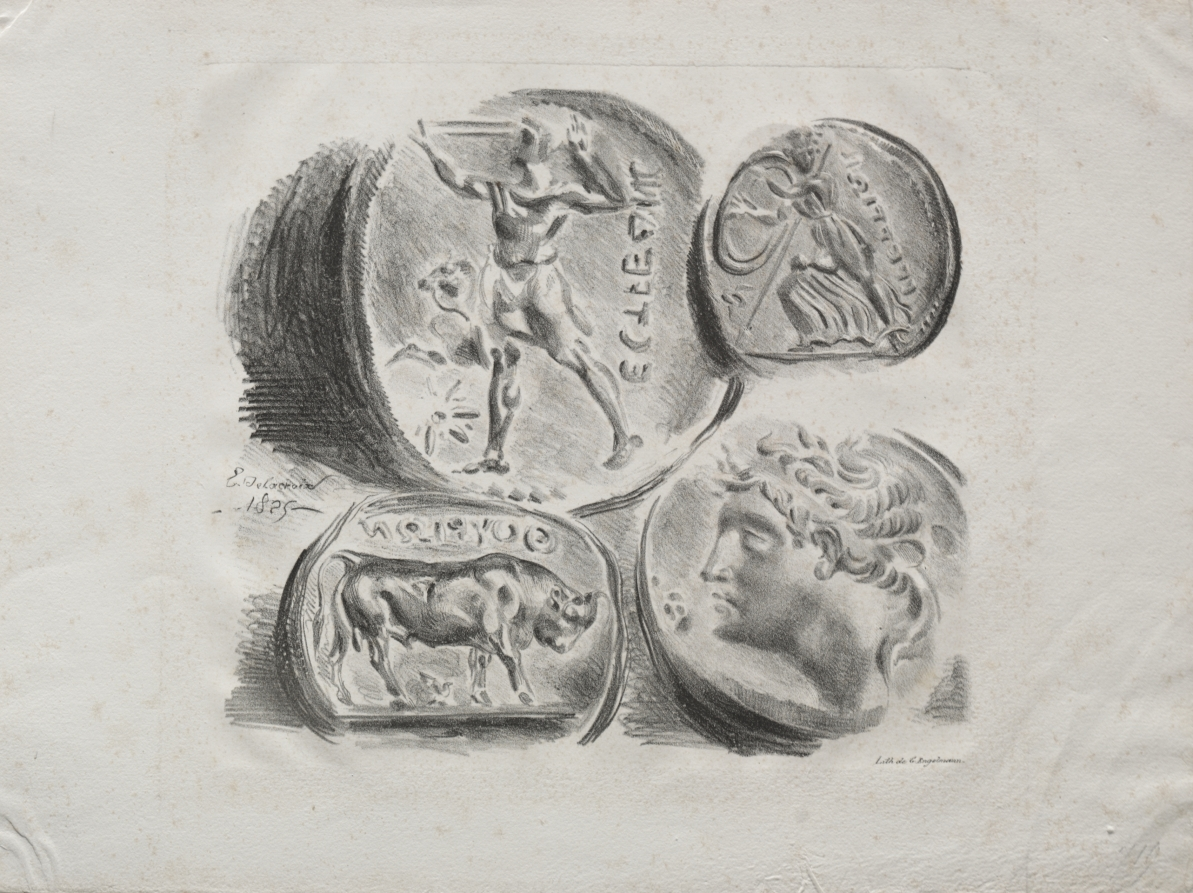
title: Sheet of Four Antique Medals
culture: France, 19th century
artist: Eugène Delacroix (French, 1798–1863)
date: 1825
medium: lithograph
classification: Print